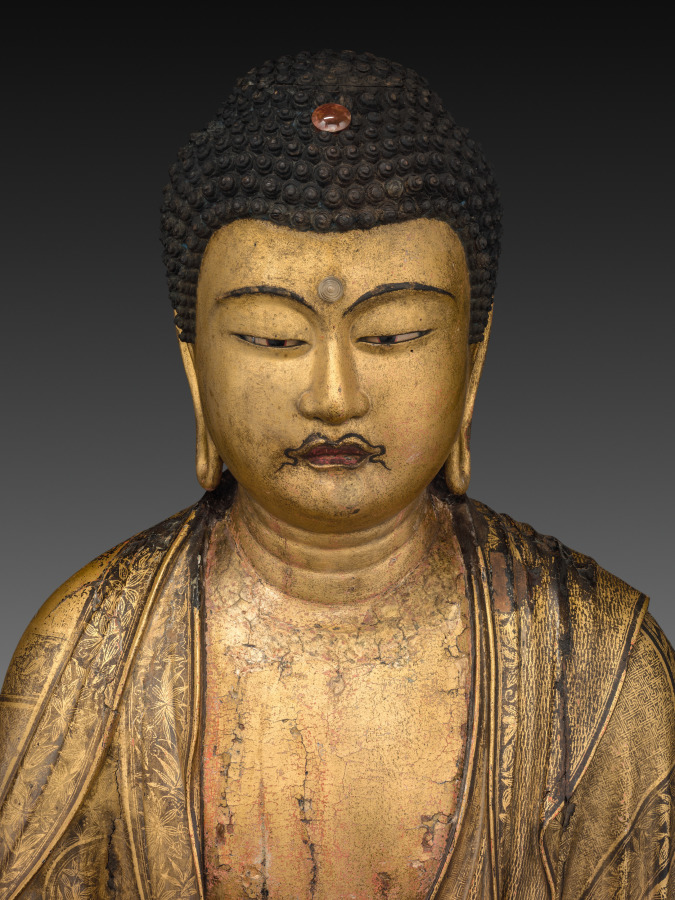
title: Buddha of Infinite Life and Light (Amida Nyorai)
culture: Japan, Kamakura period (1185–1333)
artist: Kōshun (Japanese, active mid-1200s)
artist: assisted by Koshin (Japanese, active mid-1200s)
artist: assisted by Joshun (Japanese, active mid-1200s)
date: 1269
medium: Cypress with lacquer, color, gold, cut gold, rock-crystal inlaid eyes, and quartz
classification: Sculpture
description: This ornate Buddha Amida stands in a posture of welcome, greeting the dying who will accompany him back to his Pure Land. Documents inserted into the sculpture’s hollow core around the time of its creation include a copy of the sacred text Amida Sutra, a register of donors who desired to be joined together in generating karmic merit (kechien) through the creation and dedication of the sculpture, and a record asserting that the image was completed over the course of 33 days in 1269 at Shitennōji Temple in Osaka.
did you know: The lead sculptor was Kōshun, who had been granted the lofty title “Bridge of the Law.”